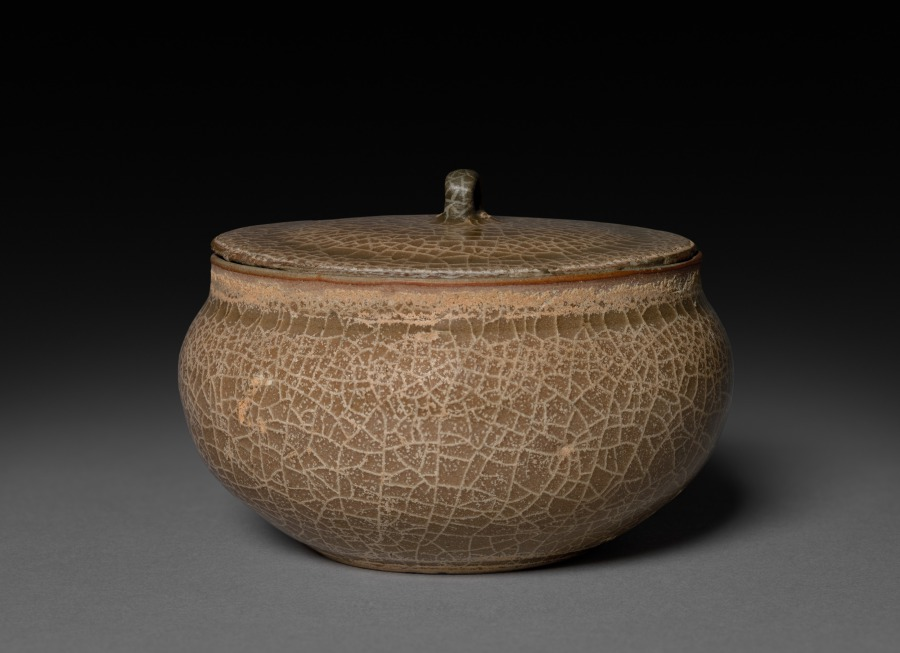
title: Covered Flat Jar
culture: China, Hangzhou, Suburban Altar Kiln, Southern Song dynasty (1127-1279)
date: 1127–1279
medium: glazed buff stoneware, Guan ware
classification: Ceramic